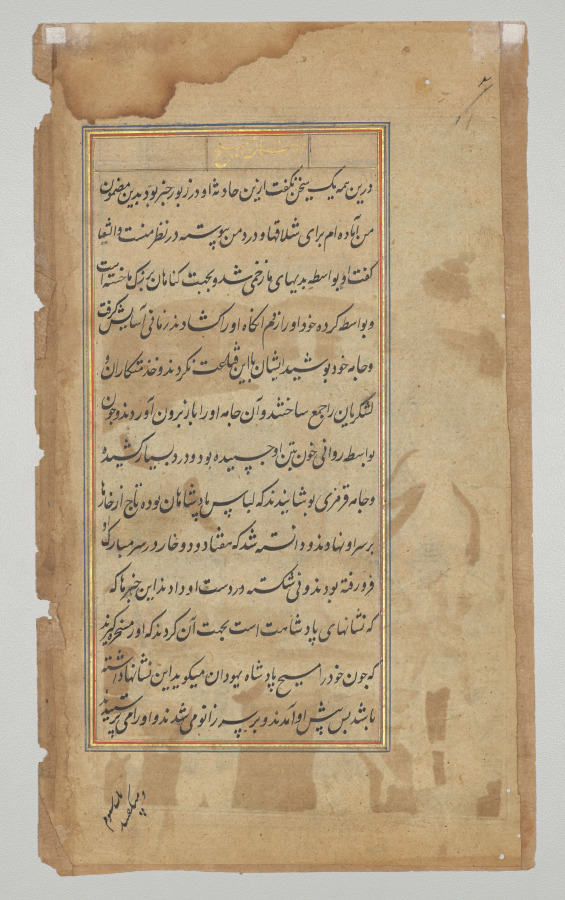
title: Text page from a Mirror of Holiness (Mir’at al-quds) of Father Jerome Xavier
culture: Mughal India, Allahabad, made for Prince Salim (1569–1627)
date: 1602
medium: Ink and gold on paper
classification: Manuscript